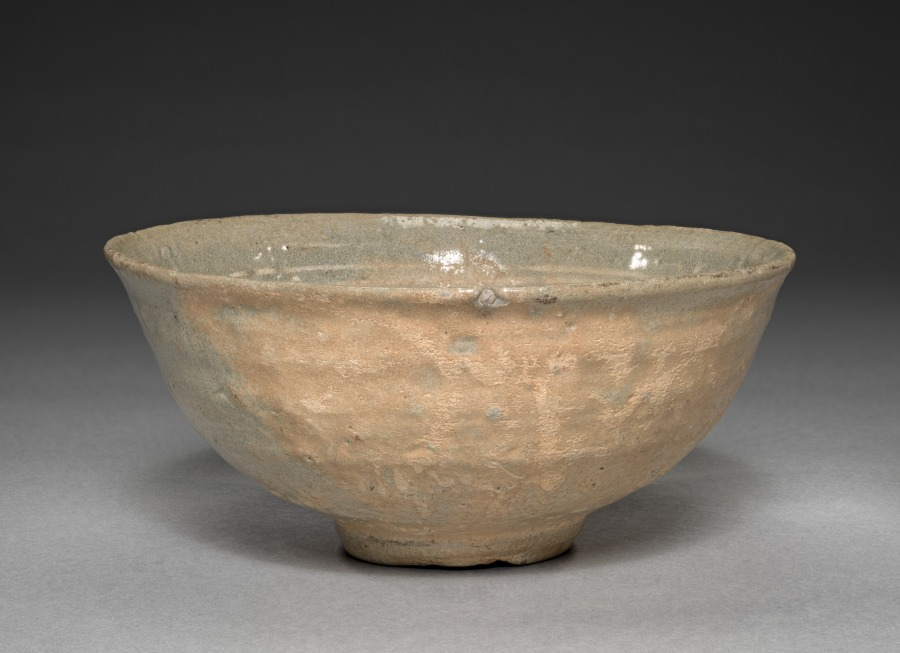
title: Bowl with White-slip Decorations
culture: Korea, Joseon dynasty (1392–1910)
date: 1600s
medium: glazed ceramic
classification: Ceramic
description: This type of wide-mouthed bowl was used every day in Korea, not exclusively for tea drinking. But when it was introduced to Japan around the early 1500s its imperfect appearance evoking the aesthetics of wabi-sabi caused it to be repurposed as a tea bowl. Korean tea bowls were circulated as a item of foreign luxury among Japanese military elites. It's highly possibly this type of bowl was produced in one of the kilns operated by the trading office Busan in Southern Gyeongsang province, and exported to Japan.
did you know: This type of rustic tea bowl was highly appreciated among advanced Japanese practitioners of the tea ceremony.